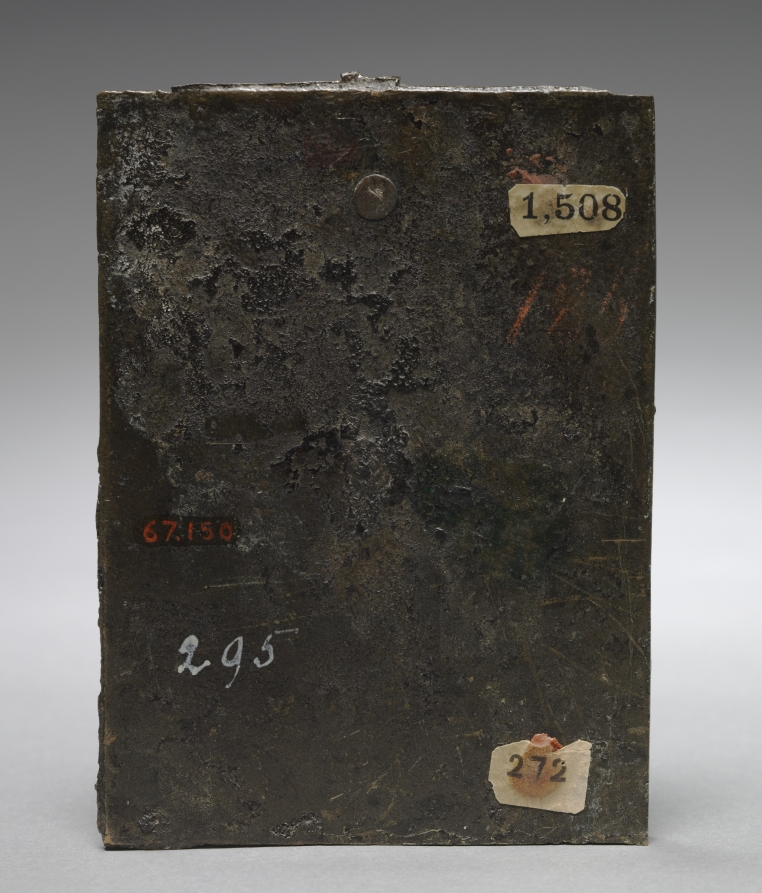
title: The Flagellation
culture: Italy, 16th century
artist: Moderno (Italian, 1467–1528)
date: 16th century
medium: bronze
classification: Sculpture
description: Although not exact copies, the compositions of both this bronze plaque and drawing derive from the Laocoön group, an ancient marble sculpture unearthed in 1506 in Rome. The nearly life-size statue of the Trojan priest Laocoön and his sons battling giant sea snakes quickly became a source of inspiration for artists. They especially appreciated the emotional anguish and physical strain portrayed by the struggling male nudes. In The Flagellation, the sculptor Moderno adopted Laocoön’s pose and muscularity for the suffering figure of Christ, thereby presenting him as an athletic and virtuous hero. Pordenone’s drawing of a man entwined by two serpents seems to be his own expressive version of Laocoön.